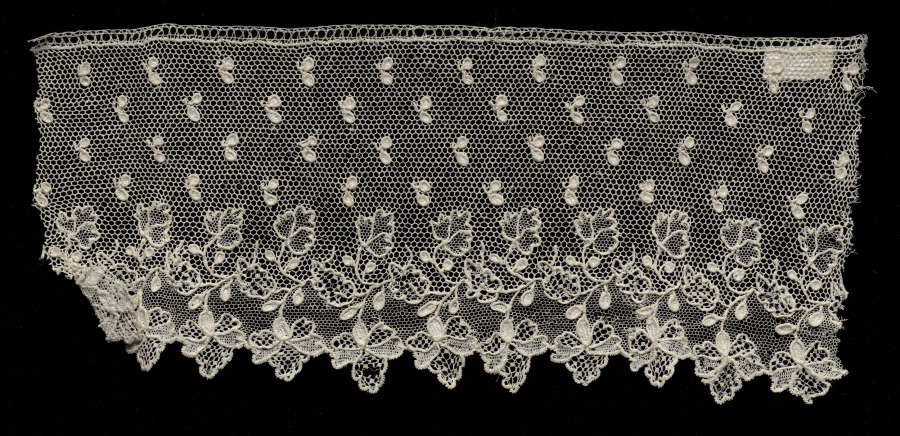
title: Lace Edging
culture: France, Alençon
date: 1700s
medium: Linen: needle lace (Point d'Alençon)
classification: Lace